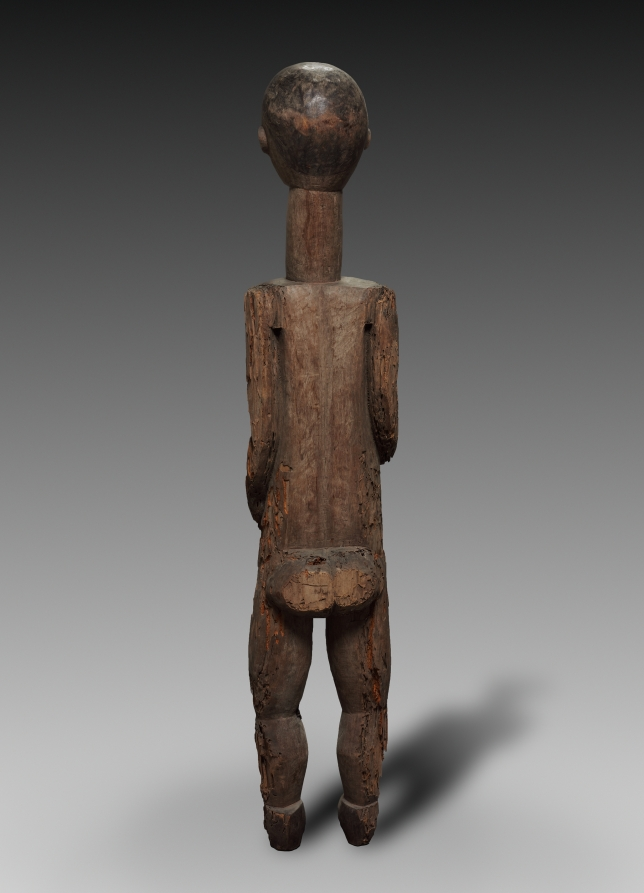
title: Figure of a Pair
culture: Africa, Central Africa, Democratic Republic of the Congo or Central African Republic (most likely), possibly Monzombo-style maker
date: late 1800s–early 1900s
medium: Wood and iron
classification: Sculpture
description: The Ubangi region's history of successive migrations and assimilations has resulted in numerous exchanges of religious beliefs and ritual practices. Despite some stylistic traits, including the heart-shaped faces and the male's crested coiffure, this figure with its female pair is unlike any other in the Ubangian corpus. Based on indirect evidence, the pair is said to represent the culture's primordial couple.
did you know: There are no other carved mother-child figures that originate from the Monzombo ethnic group.